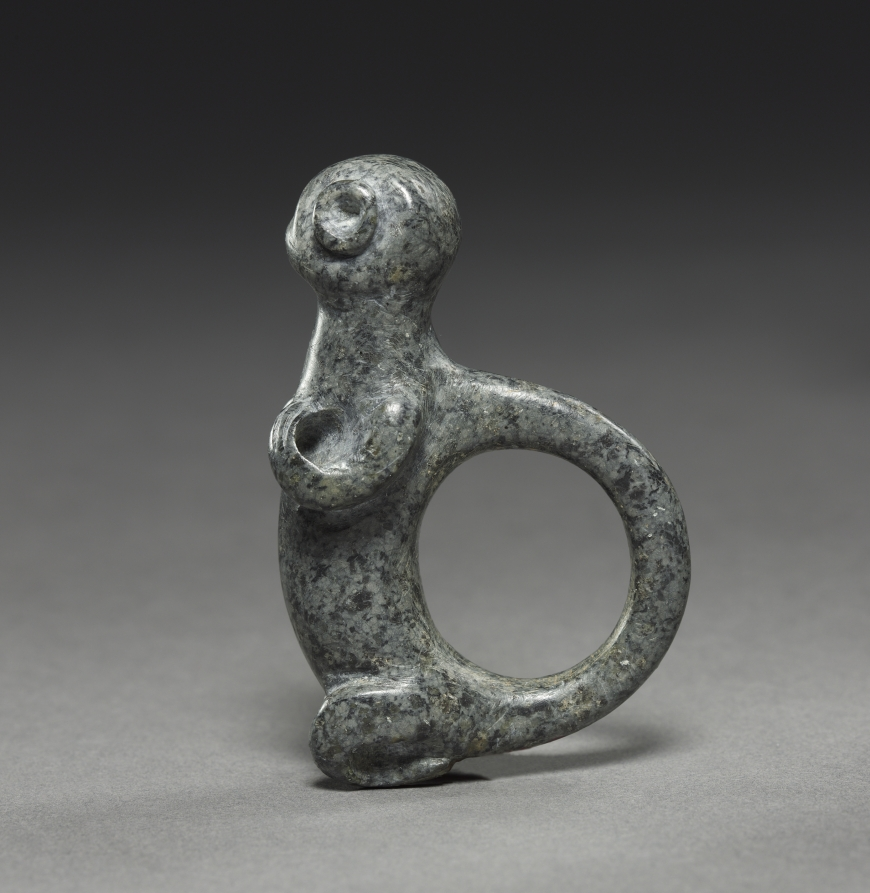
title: Monkey Pendant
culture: Panama, International Style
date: c. 400–900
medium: stone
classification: Sculpture